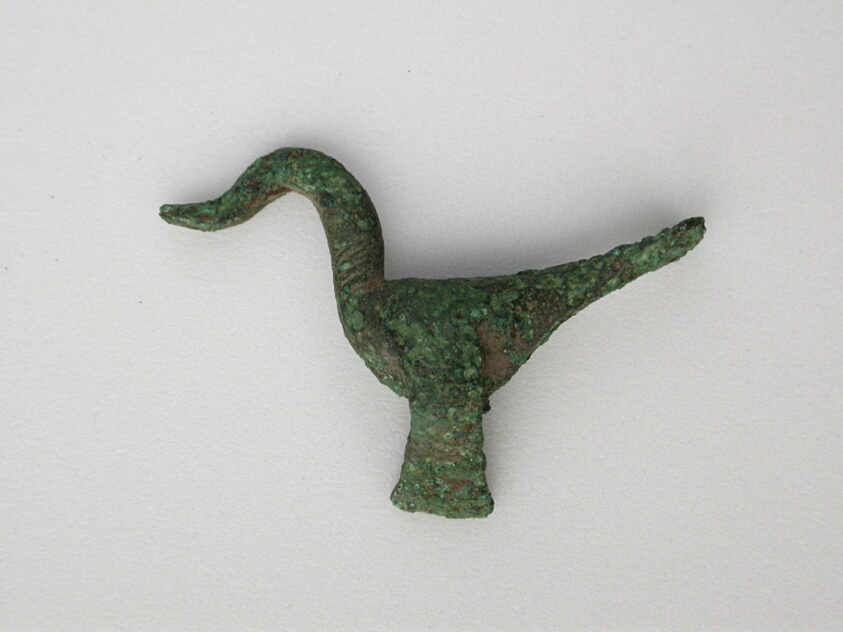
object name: Decorative Arts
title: Bird with Flat Legs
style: geometric, ancient, greek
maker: Greek; Thessaly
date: Geometric Period (800–600 BCE)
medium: Bronze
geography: Greece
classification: votive offering; ex-voto; decorative arts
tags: bird